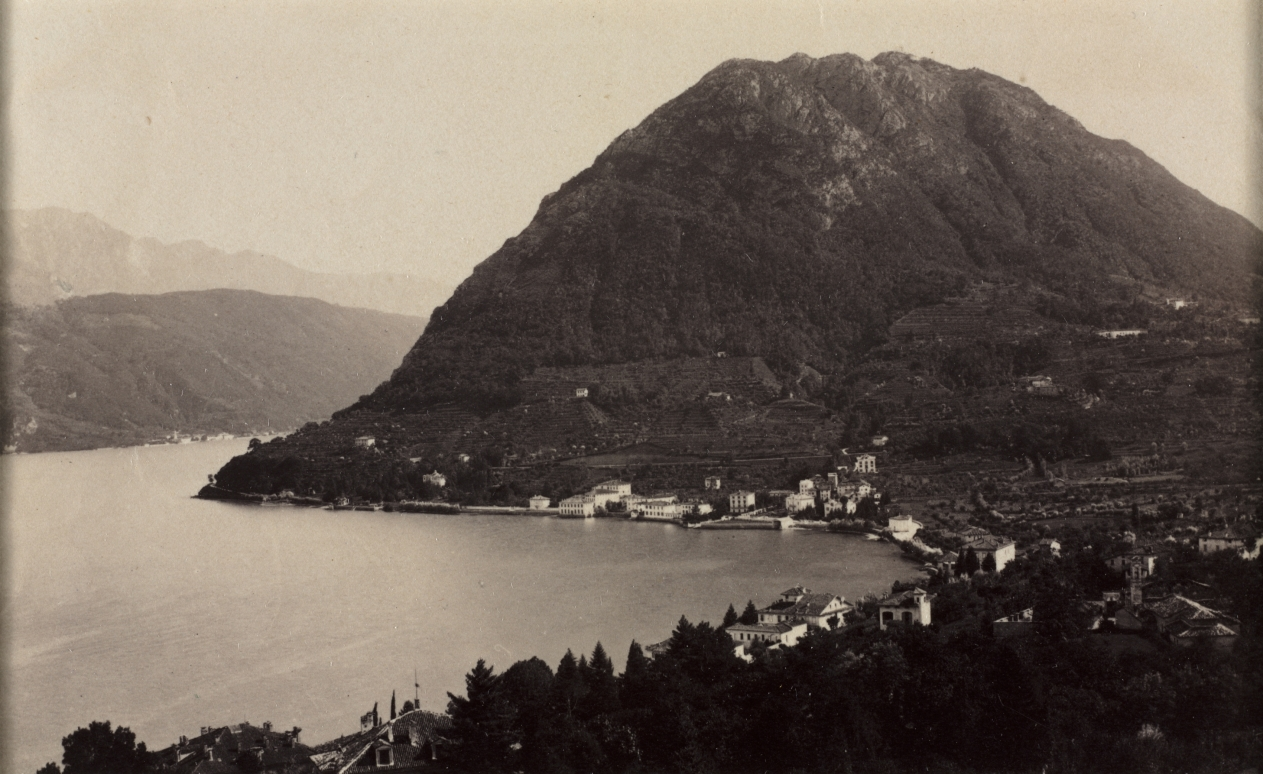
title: Baveno, Lake Maggiore, Italy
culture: Italy, 19th century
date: c. 1870–80s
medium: albumen print from wet collodion negative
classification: Photograph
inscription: written in pencil on verso: "923 Baveno lac majeur"